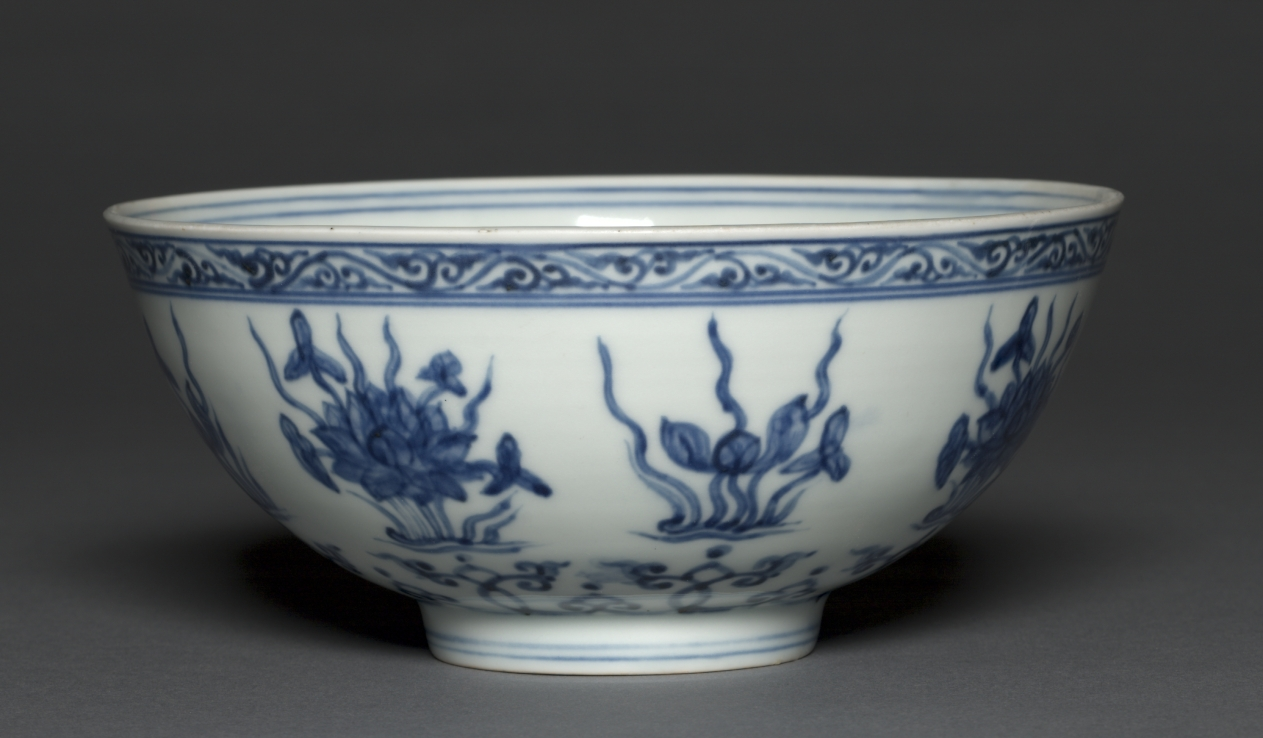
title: Bowl (wan) with Water Plants and Arabesques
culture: China, Jiangxi province, Jingdezhen kilns, Ming dynasty (1368-1644), Zhengde mark and reign (1506-21)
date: 1506–21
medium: porcelain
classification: Ceramic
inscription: 正德年製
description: Arabesques, an ornamental design of intertwined flowing lines inspired by Middle Eastern culture, appear on Chinese blue-and-white porcelain since the 1300s. The early Ming emperors, particularly the Zhengde emperor, promoted Islam and commissioned porcelain with Islamic calligraphy.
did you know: Chinese potters integrated foreign motifs, shapes, and ideas in order to cater to changing tastes and new customers in an increasingly global world.